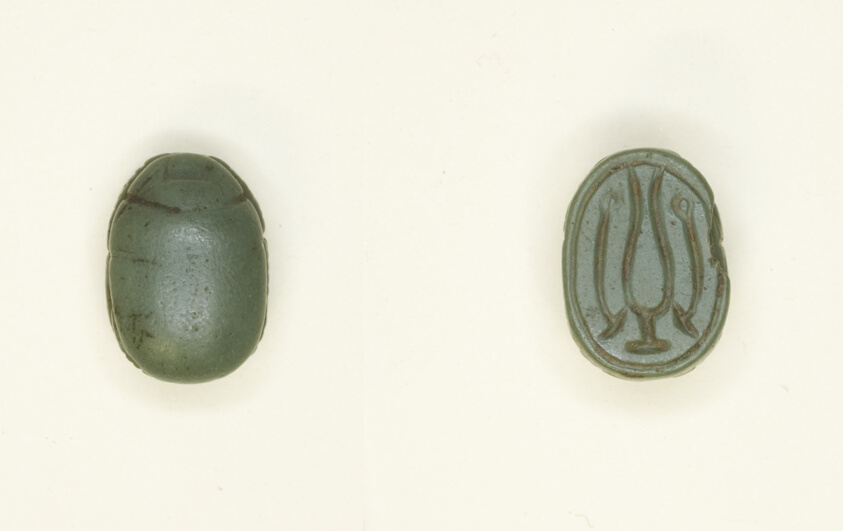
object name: Costume and Accessories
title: Scarab: Hieroglyphs (Hs-vessel and wAs-Scepters)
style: new kingdom, eighteenth dynasty, ancient, egyptian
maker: Egyptian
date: New Kingdom, Dynasty 18 (?) (about 1550–1295 BCE)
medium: Stone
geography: Egypt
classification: scarab; ancient art; costume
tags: scarab beetle, insects, Hieroglyphs